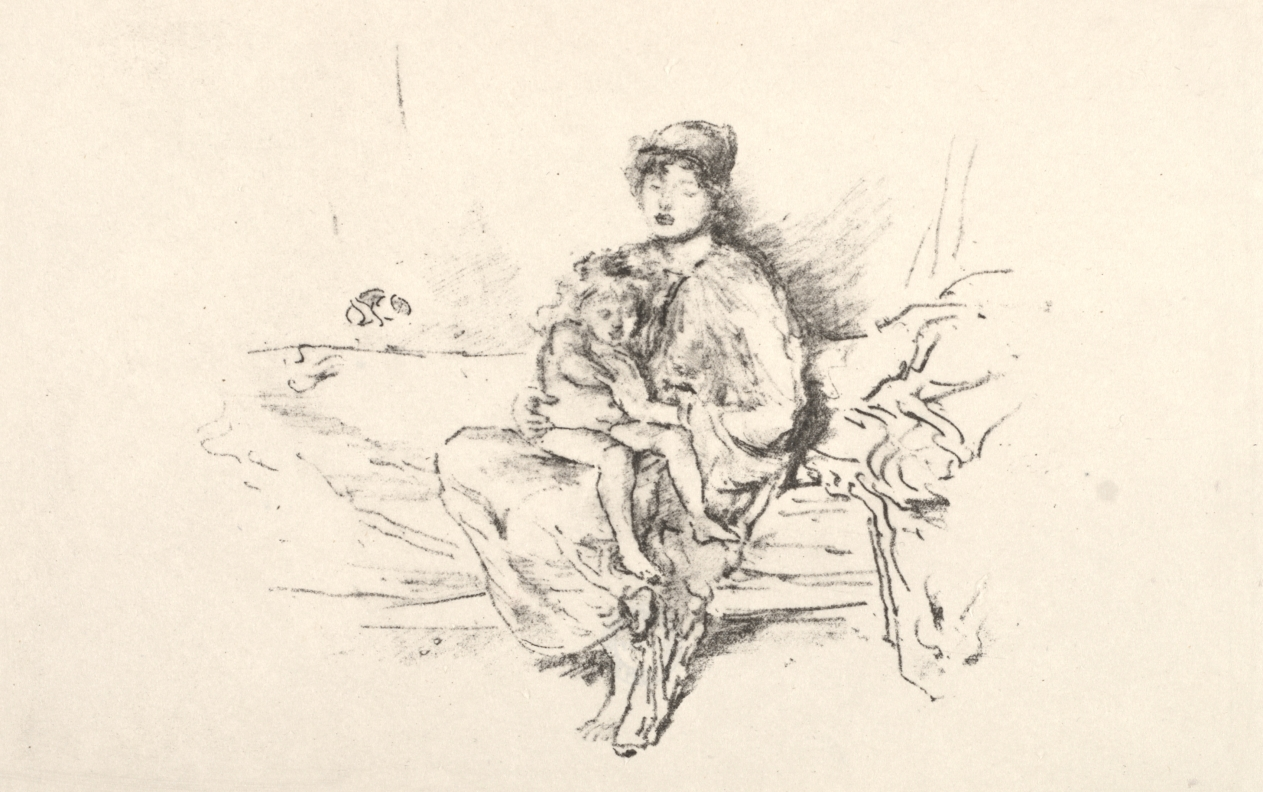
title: Mother and Child, No. 2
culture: America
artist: James McNeill Whistler (American, 1834–1903)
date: 1890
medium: lithograph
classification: Print